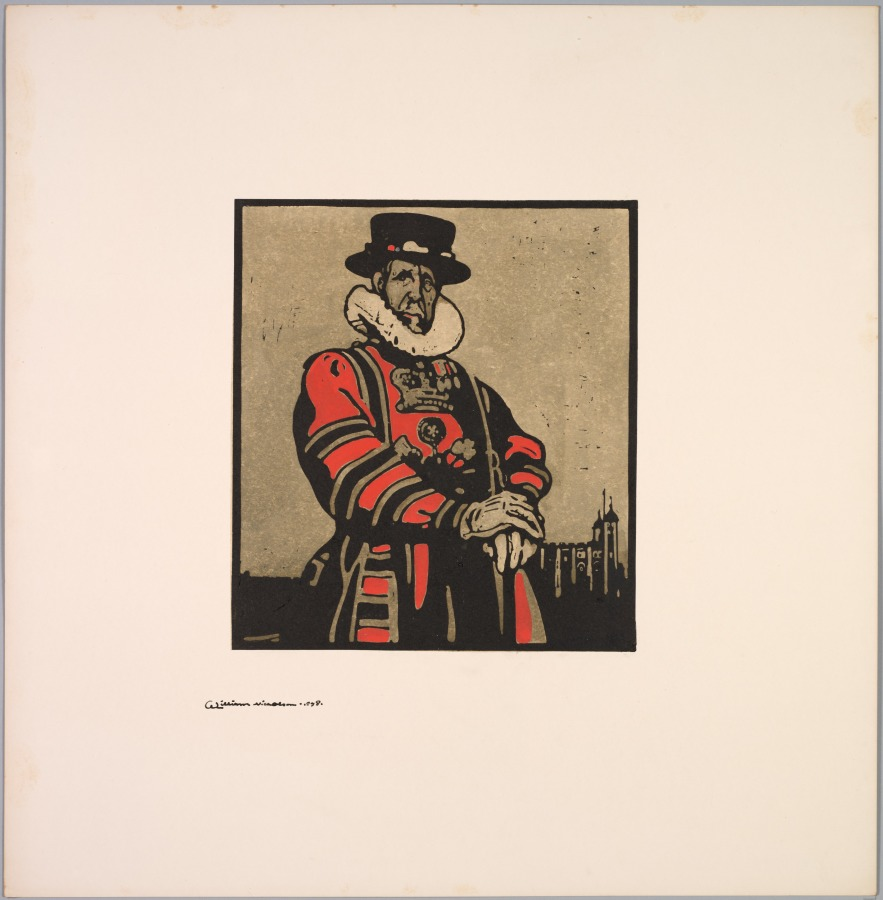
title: London Types: Beef-eater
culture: England, 19th century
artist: William Nicholson (British, 1872–1949)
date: 1898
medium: woodcut hand-colored with watercolor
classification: Print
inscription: lower left margin, in black ink: William Nicholson - 1898 -